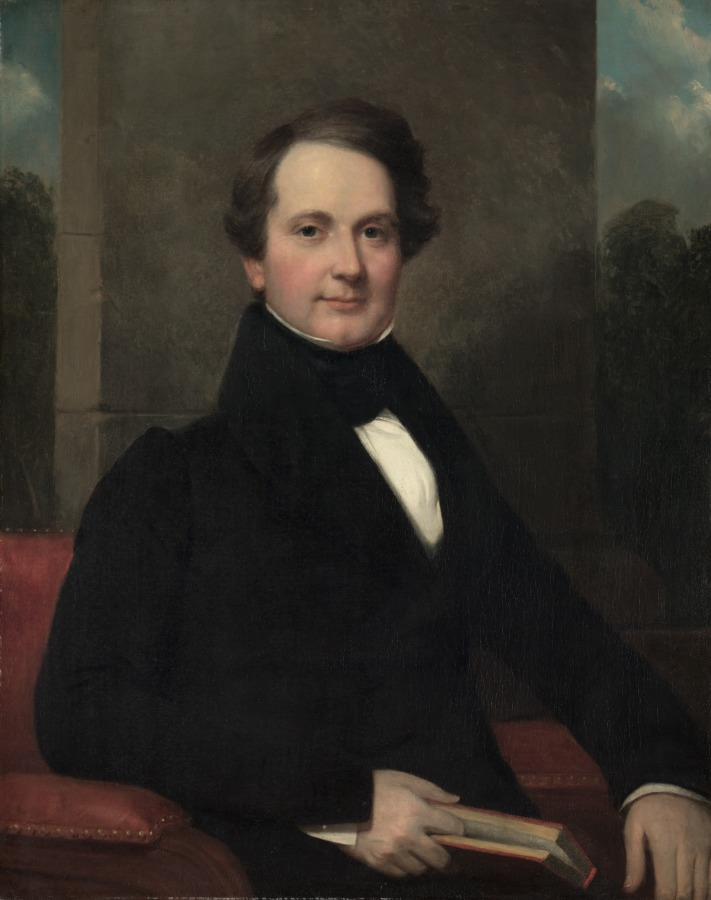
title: Frederic Betts; Mary Ward Betts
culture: America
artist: Henry Inman (American, 1801–1846)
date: 1830s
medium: oil on canvas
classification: Painting